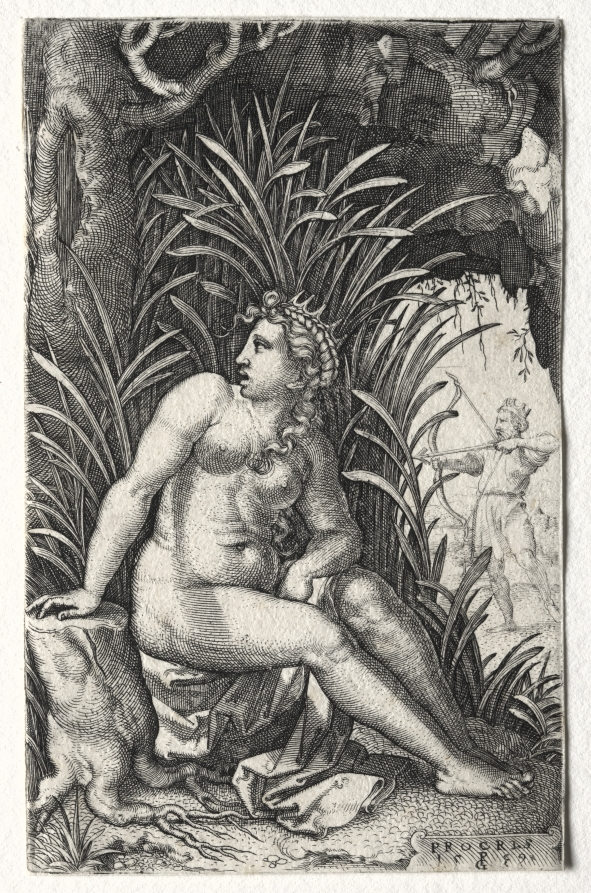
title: Procris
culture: Germany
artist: Georg Pencz (German, c. 1500–1550)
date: 1539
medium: engraving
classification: Print